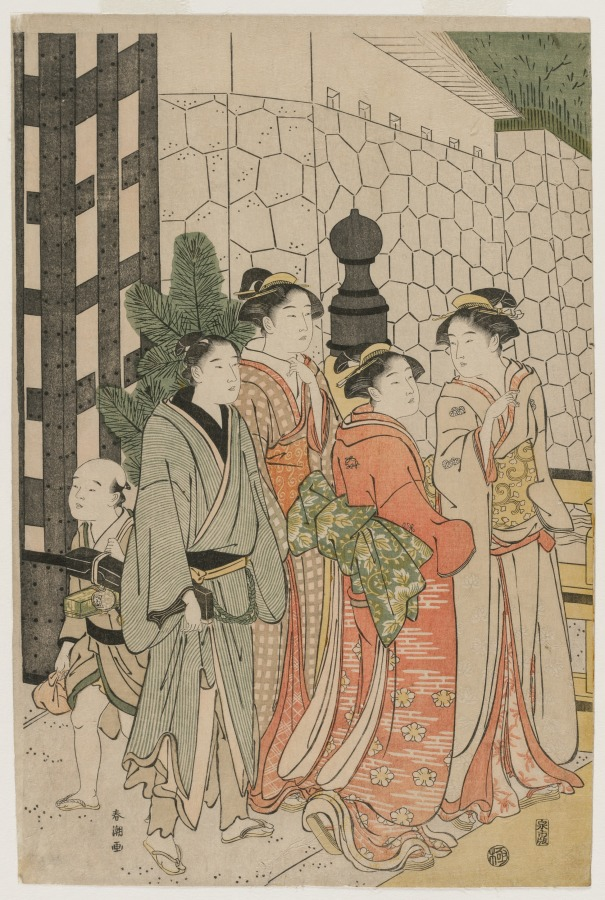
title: Young Man and Women on Tokiwa Bridge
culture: Japan, Edo period (1615–1868)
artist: Katsukawa Shunchō (Japanese)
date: early 1790s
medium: color woodblock print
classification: Print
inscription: Signature: Shuncho ga Publisher: Izumiya Ichibei (Senichi han) Censorship Seal: kiwame